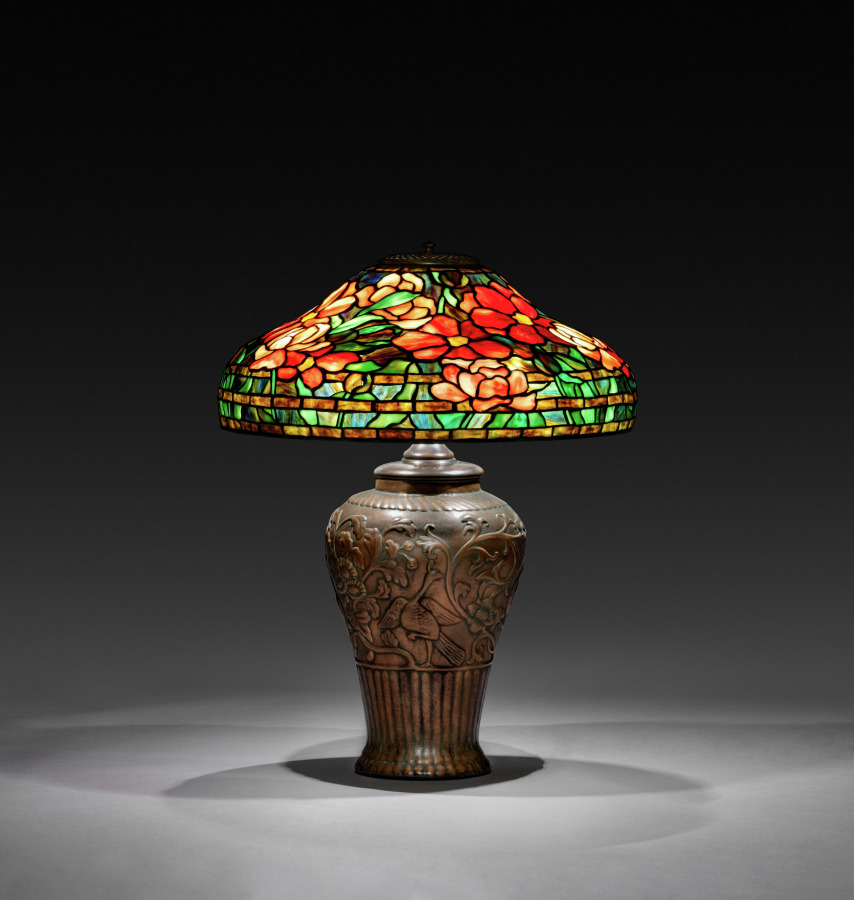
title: Peony Table Lamp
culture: America, New York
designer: probably by Clara Wolcott Driscoll (American, 1861–1944)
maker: Tiffany Studios (United States, New York, 1902–32)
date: c. 1905–15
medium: Leaded glass, bronze, ceramic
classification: Lamp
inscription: Shade impressed: TIFFANY STUDIOS NEW YORK 1475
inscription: Based scratched: BP250 L.C. Tiffany Bronze Pottery Favrile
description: In the 1870s a renewed emphasis on natural landscapes ushered in a generation of cottage gardeners who delighted in planting perennials in large quantities. Louis Comfort Tiffany was among those who championed the lush, sometimes wild-looking displays of varied floral species in the garden at his Long Island estate, Laurelton Hall. Tiffany encouraged his designers to take inspiration from his garden by shipping fresh cuttings almost weekly to his studios. Ohio native Clara Wolcott Driscoll and her team of female designers created floral patterns for lamps and mosaics based on the colorful blooms of spring that became among the most sought after and commercially successful of Tiffany’s production.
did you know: The base of this lamp looks like it is made of metal, but it is really just a ceramic base painted to look like bronze.